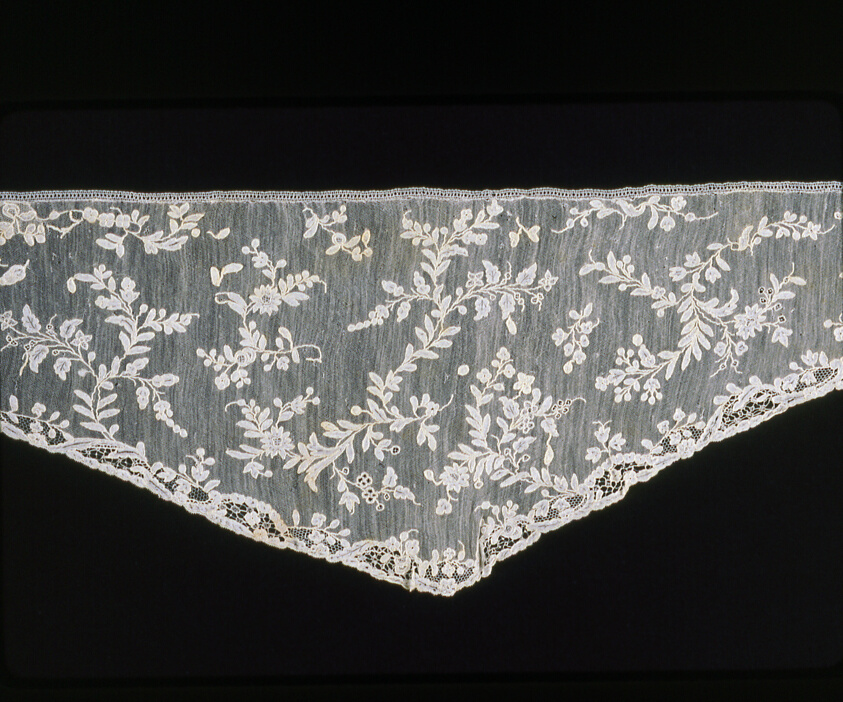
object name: Costume and Accessories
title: Shaped Sleeve Ruffle (Engageanté)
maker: Italy, Burano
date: 1760s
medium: Linen, needle lacer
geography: Burano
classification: costume accessory; lace - needle; textile; costume